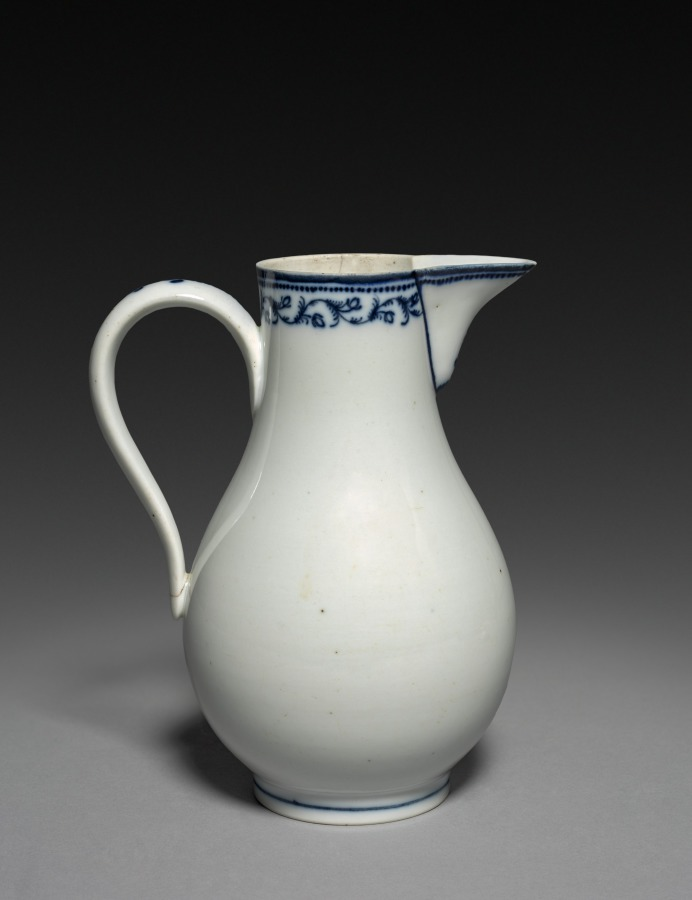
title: Pitcher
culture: France, 18th century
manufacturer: Niderviller Factory (French)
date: c. 1780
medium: hard-paste porcelain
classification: Ceramic